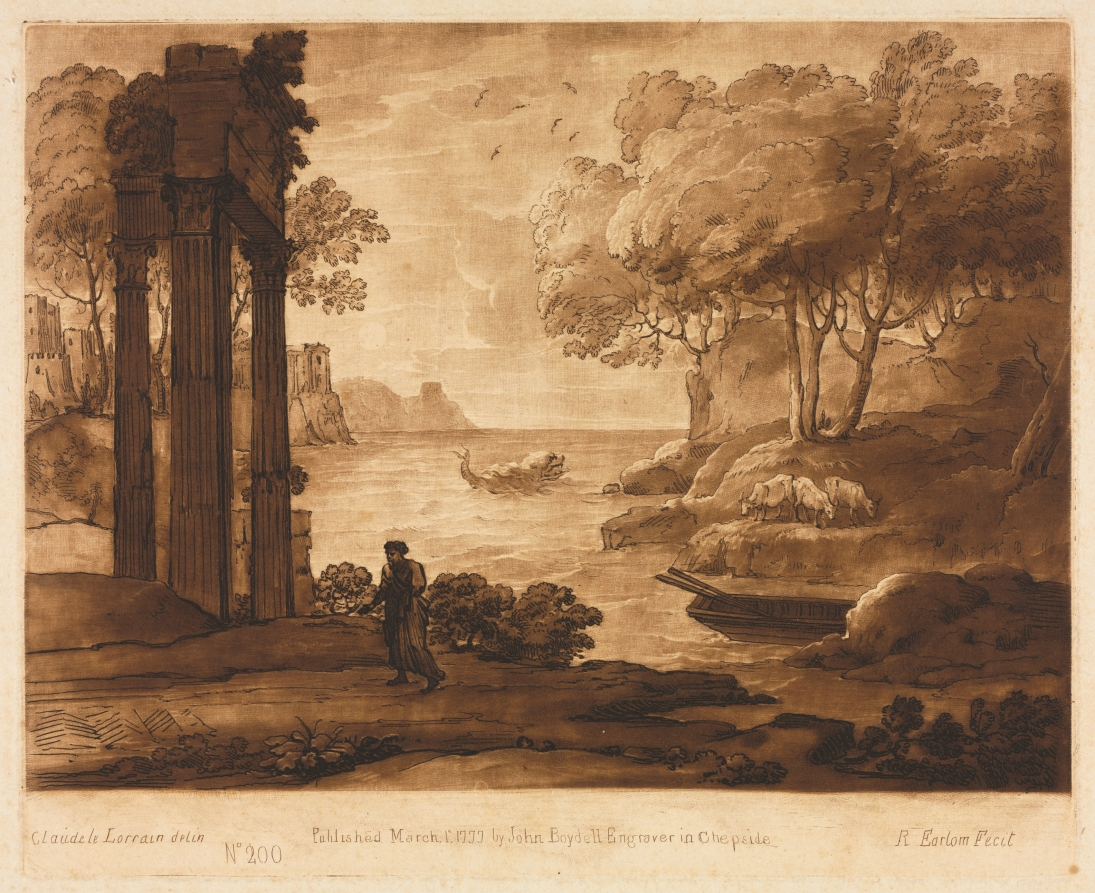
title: Liber Veritatis: No. 200, A View on the Sea Shore, with the Story of Jesus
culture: England, 18th century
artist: Richard Earlom (British, 1743–1822)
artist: after Claude Lorrain (French, 1604–1682)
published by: John Boydell (British, 1720–1804)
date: 1777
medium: etching and mezzotint printed in brown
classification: Print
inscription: inscribed lower margin in plate: From the Original Drawing, in the collection of the Duke of Devonshire (according to JB "scratched plate")